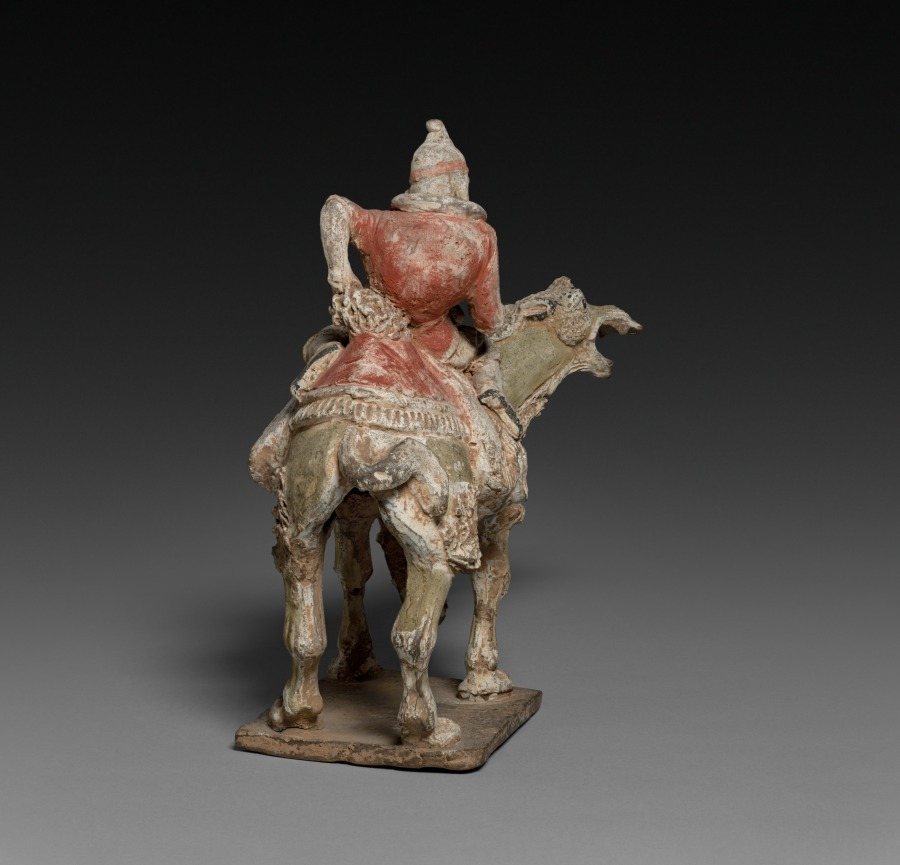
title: Camel with Rider (Tomb Figure)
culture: China, Sui dynasty (581-618) - Tang dynasty (618-907)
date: 20th Century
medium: brown earthenware with polychromy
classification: Sculpture